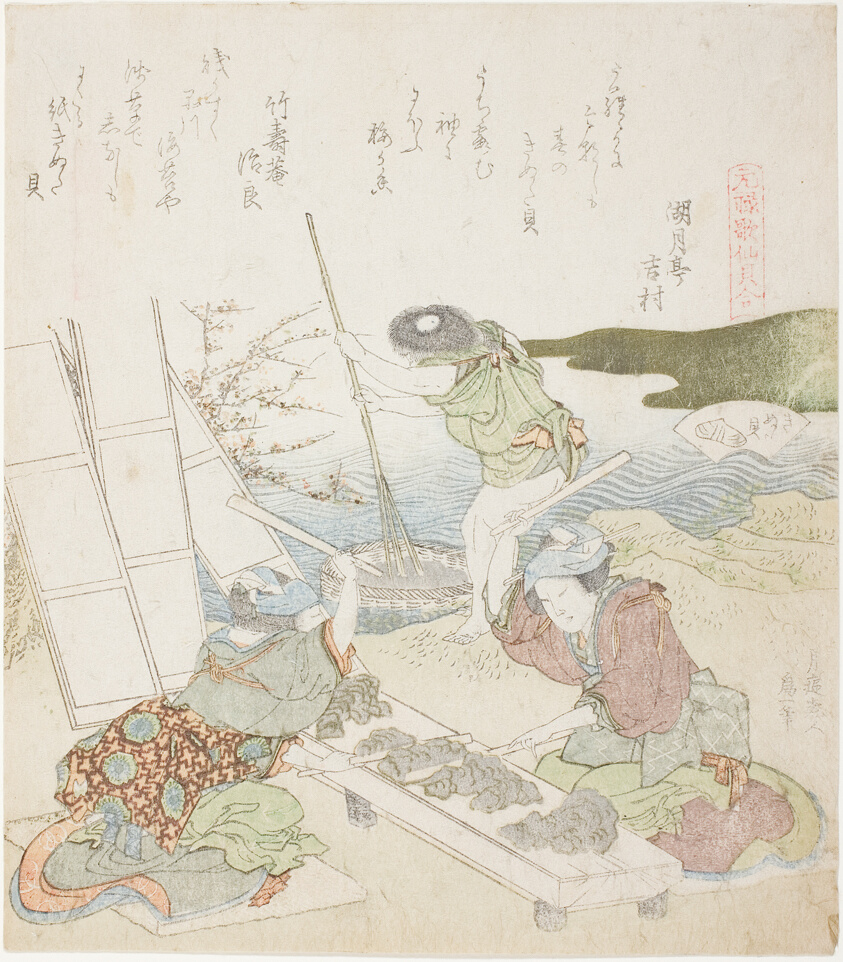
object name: Print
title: Recycling Paper, illustration for The Fulling-block Shell (Kinuta gai), from the series "A Matching Game with Genroku-period Poem Shells (Genroku kasen kai awase)"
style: Japanese (culture or style)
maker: Katsushika Hokusai 葛飾 北斎; Japanese, 1760–1849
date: 1821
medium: Color woodblock print with metallic pigments; surimono shikishiban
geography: Japan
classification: woodblock print; print; asian art